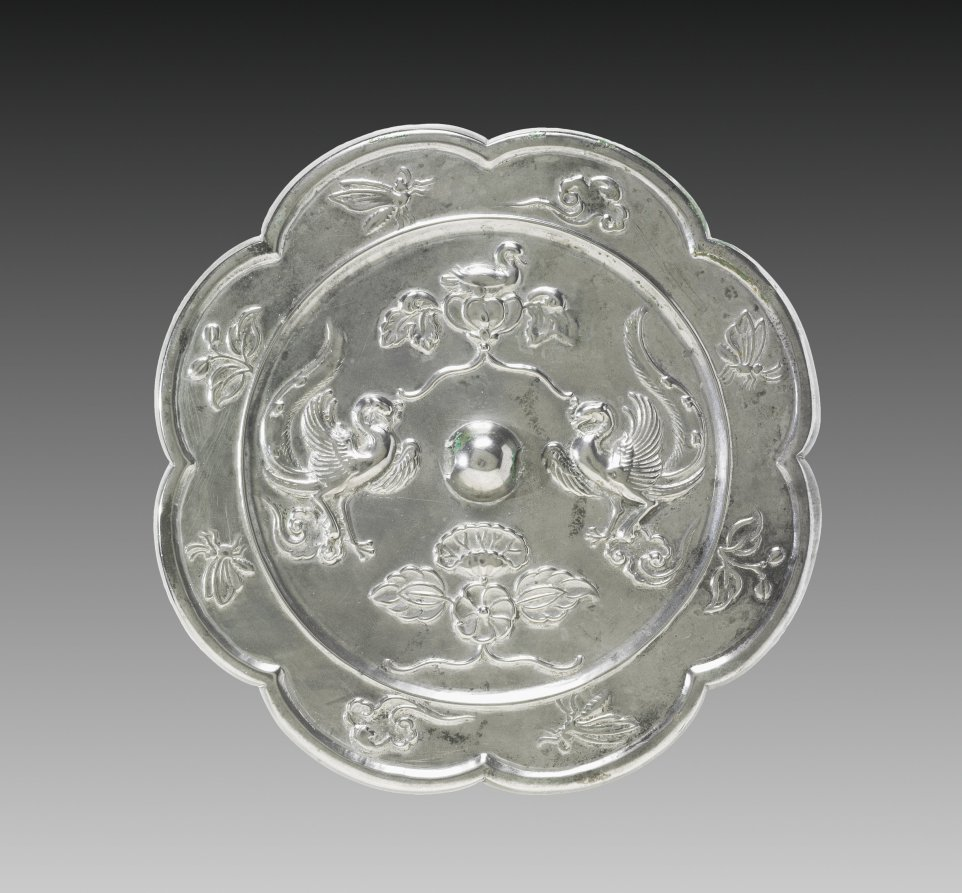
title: Lobed Mirror with Paired Phoenixes, a Nestling Bird, and a Lotus Blossom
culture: China, Tang dynasty (618-907)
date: 700s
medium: bronze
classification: Metalwork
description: Bronze mirrors typically have one polished reflective side and a decorative back with a knob to be able to lift it.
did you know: From flowers to animals, each detail on this mirror has symbolic meaning.